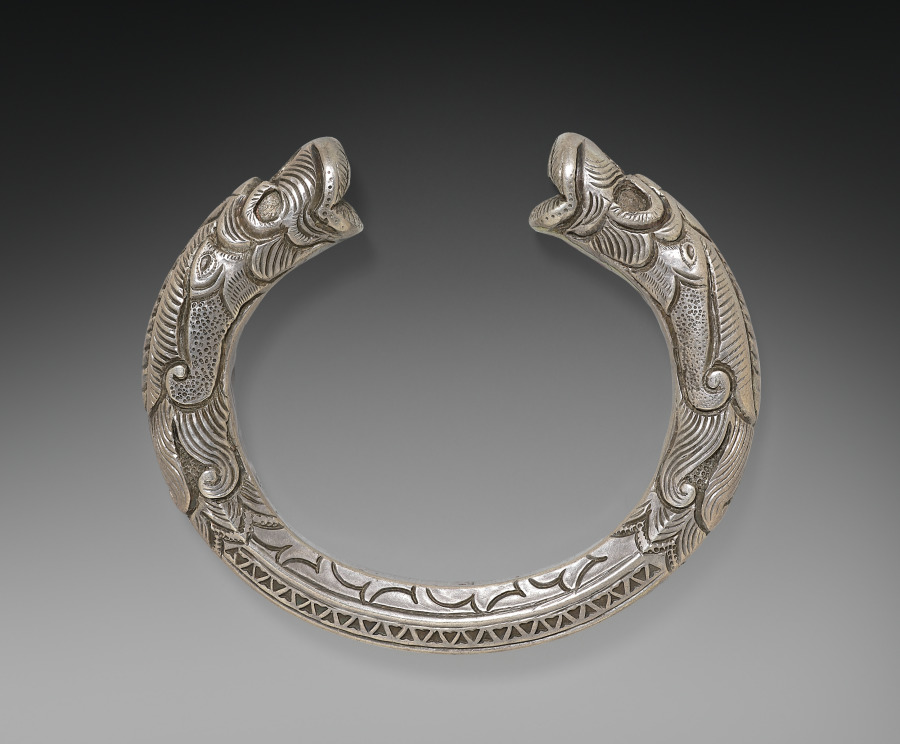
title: Bracelet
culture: India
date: 1800s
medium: silver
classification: Jewelry